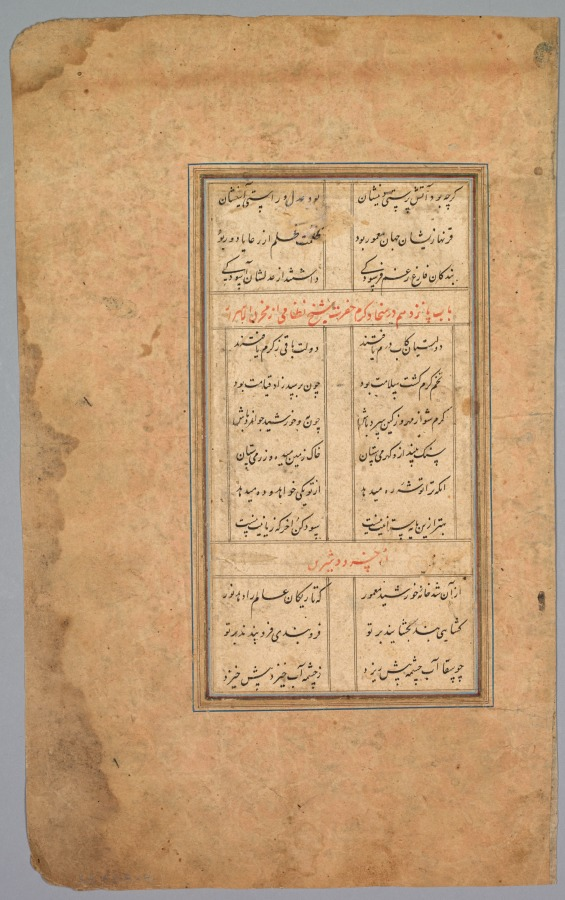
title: School Exercise Alphabet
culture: India, Mughal Dynasty (1526-1756)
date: 18th century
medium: ink on paper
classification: Manuscript